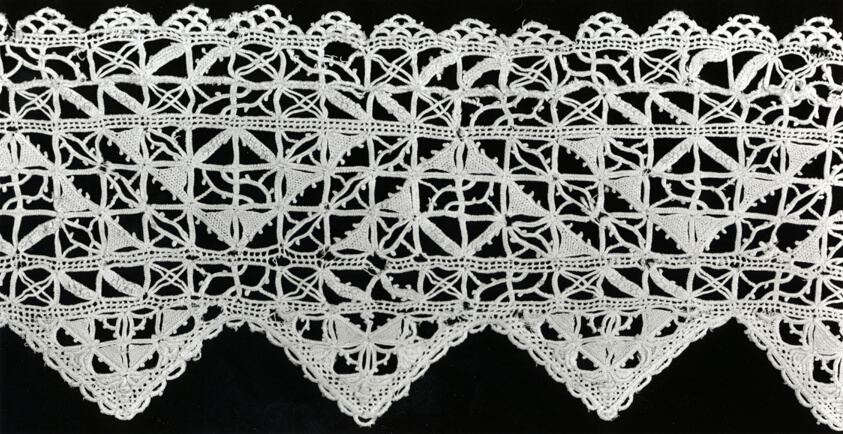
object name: Textile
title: Border (From a Cover)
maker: Italy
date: 1550/1600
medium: Linen, needle lace worked on plain weave cut and drawn thread grid; embroidered in double hem and overcast stitches; two portions joined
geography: Italy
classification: textile; lace - needle